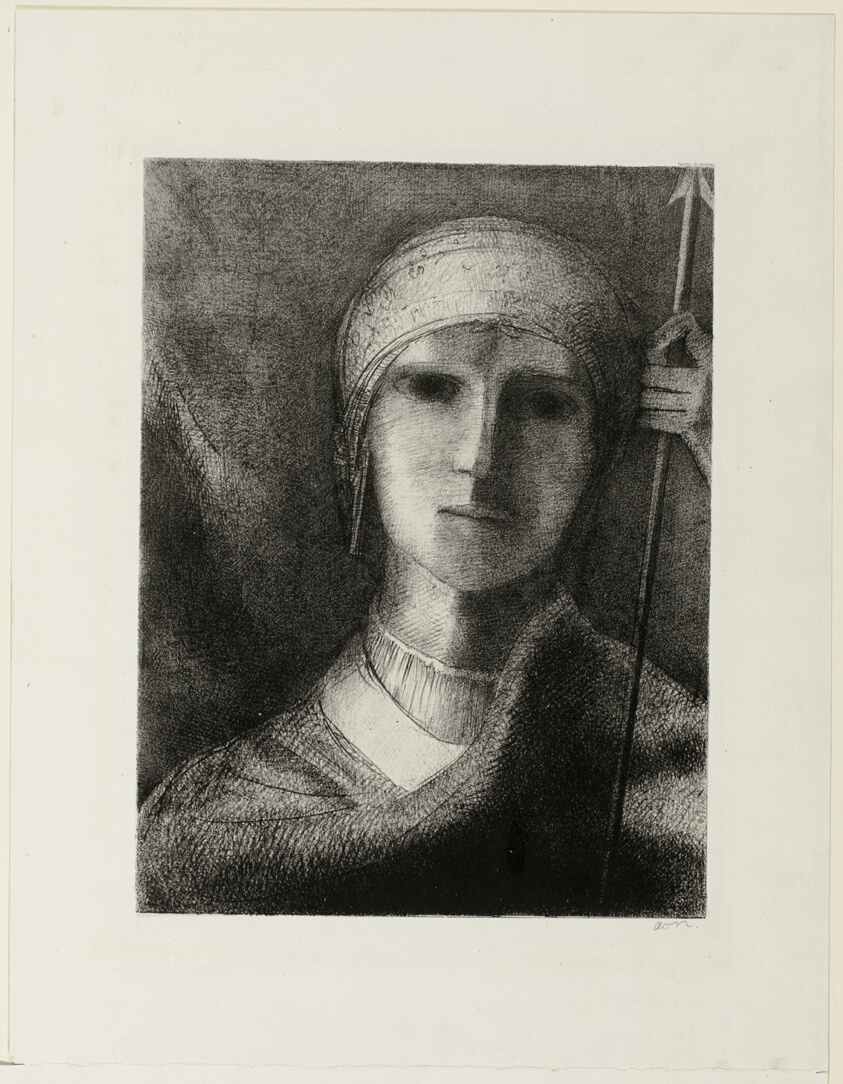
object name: Print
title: Parsifal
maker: Odilon Redon (French, 1840-1916)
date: 1891, published 1892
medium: Transfer lithograph on mounted ivory China paper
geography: France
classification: lithograph; print; prints and drawing; paper